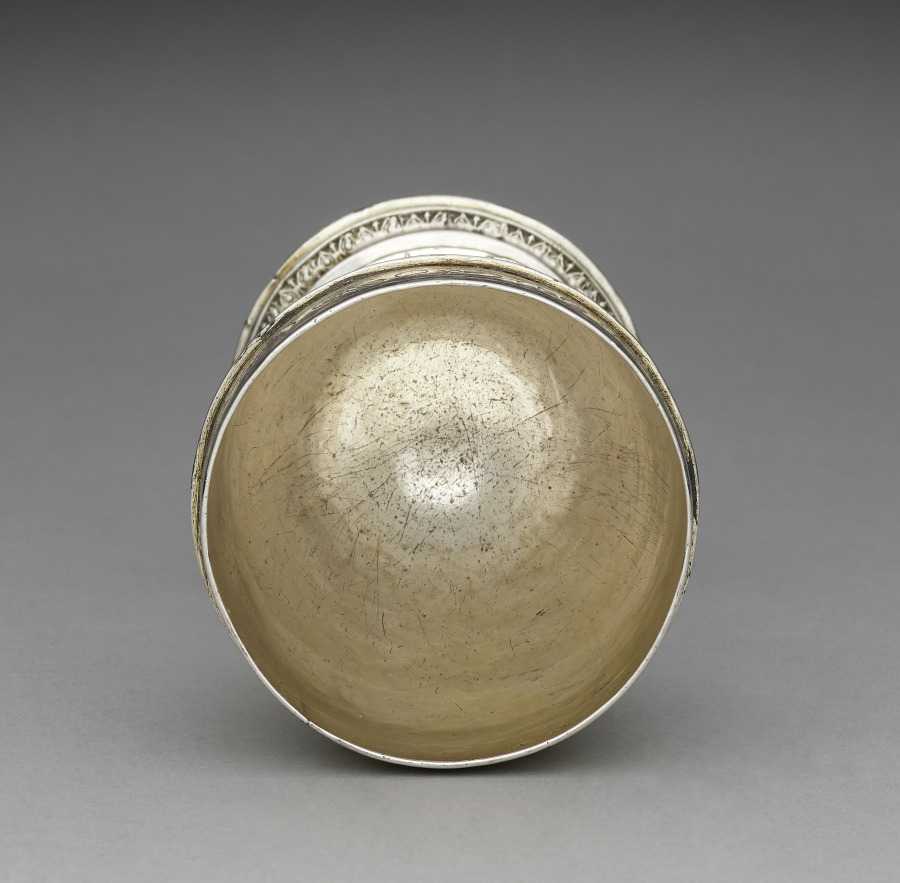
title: Standing Cup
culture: London, England: late 16th century, late 16th century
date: 1593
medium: silver, partially gilt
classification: Silver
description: Produced during the last years of the Tudor dynasty (1485–1603), this vessel exemplifies the symmetrical patterns, horizontal designs, and clear division of space typical of English silverwork at the time. The functional shape and ornamental designs characteristic of standing cups made them ideal for ceremonial occasions.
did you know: This cup has a lid. See cover record.